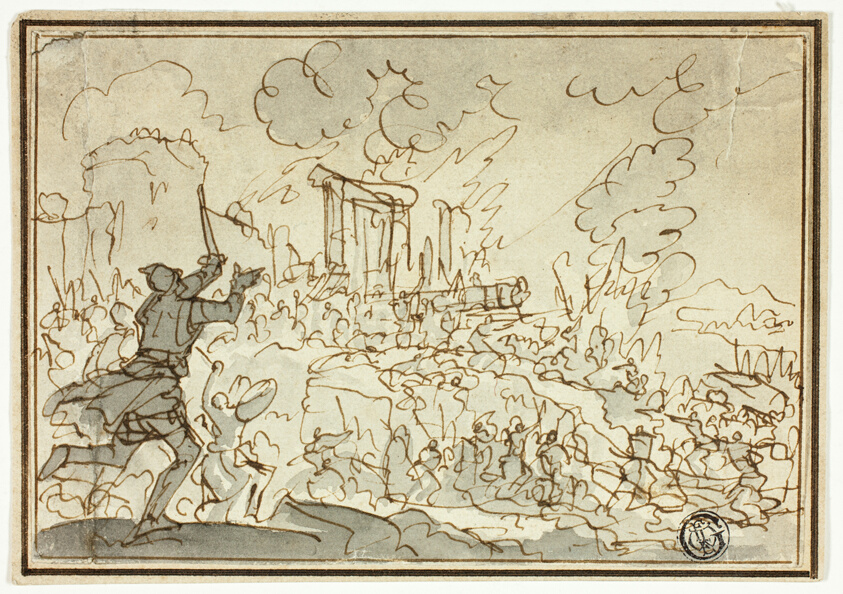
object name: Drawing and Watercolor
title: Siege of Fortress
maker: Attributed to Jan Luyken; Dutch, 1649-1712)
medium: Pen and brown ink, with brush and gray wash, on ivory laid paper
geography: Netherlands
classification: pen and ink drawings; drawings (visual works); prints and drawing